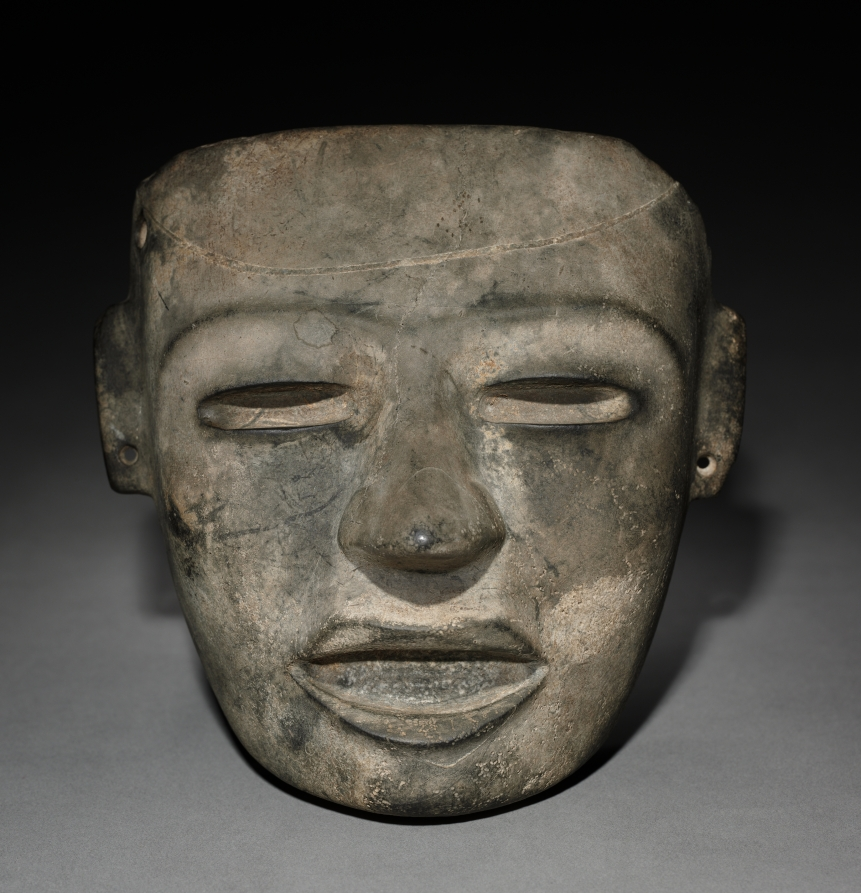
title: Mask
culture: Central Mexico, Teotihuacán style, Classic period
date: 1–550 CE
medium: stone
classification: Sculpture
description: Many Teotihuacán masks were once tied to something via holes on the back--perhaps a body-shaped form dressed in garments, ornaments, and a headdress that identified the figure. The stone masks’ eyes and mouths once held inlays representing irises, pupils, and teeth.